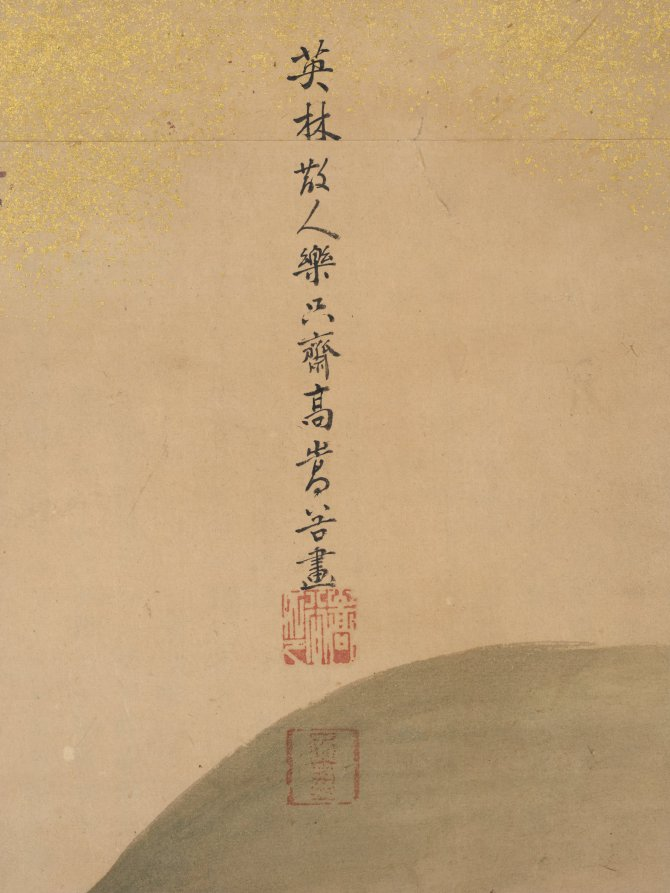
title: Spring and Autumn Farming (Spring)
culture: Japan, Edo period (1615–1868)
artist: Kō Sūkoku (Japanese, 1730–1804)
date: 1700s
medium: Six-panel folding screen, ink, light color, gold, and silver on paper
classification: Painting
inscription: Signature of the artist: "Enrin san jin Rakushisai ko Sukoku ga" (each screen)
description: These screens present the cycle of the farming year, starting with spring at right and ending with fall at left. Close examination of these screens reveals moments of games and amusement, the enjoyment of meals as well as intellectual and spiritual pursuits interspersed among the scenes of cultivating and preparing the rice harvest. The artist Kō Sūkoku is considered the 18th-century heir in style and attitude to Hanabusa Itchō (1652–1724). Itchō’s work incorporated elements from Kano school, ukiyo-e, and literati styles of painting. Kō trained with one of Hanabusa’s pupils, Sawaki Sūshi, who was best known for scenes depicting everyday life and customs.